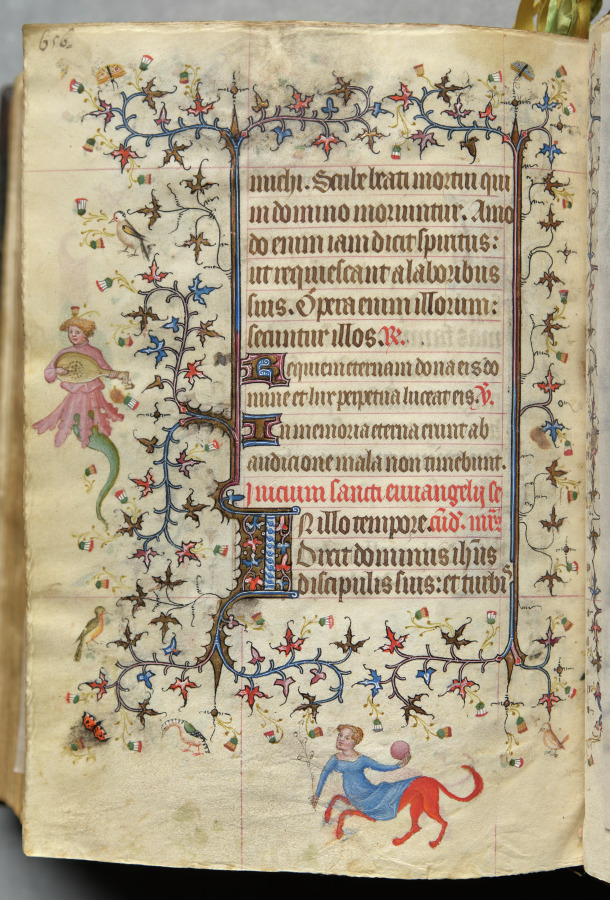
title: Hours of Charles the Noble, King of Navarre (1361-1425), fol. 322v, Text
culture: France, Paris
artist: Master of the Brussels Initials and Associates (French)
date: c. 1405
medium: ink, tempera, and gold on vellum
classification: Bound Volume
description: This precious volume was obviously highly prized by its owner, the French-born King of Navarre, who had his coat of arms painted on no less than twenty folios. Rather than directly commissioning this manuscript from a specific workshop, it seems that Charles the Noble acquired his book of hours -- perhaps ready-made for the luxury market -- while on a trip to Paris in 1404-05. A collaborative effort, six painting styles are evidenced within the pages of this codex, those of two Italians, two Frenchmen, and two Netherlanders. The painter who was responsible for the planning and decoration of the book, and who produced seventeen of the large miniatures, was a Bolognese artist known as the Master of the Brussels Initials. His principal assistant, responsible for most of the borders, was a Florentine who signed his name "Zecho" da Firenze on folio 208 verso.